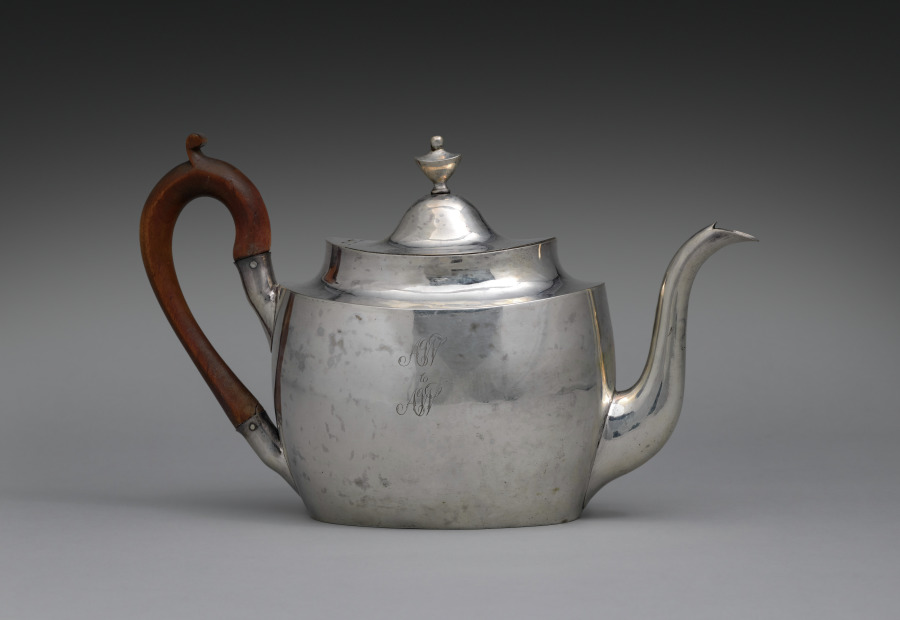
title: Teapot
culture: America, early 19th Century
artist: firm of Henry Farnam (American, 1773–1833)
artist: firm of Rufus Farnam (American, 1771-)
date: c. 1800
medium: silver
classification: Silver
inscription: engraved "AW/to/AW" in bright-cut script on side.